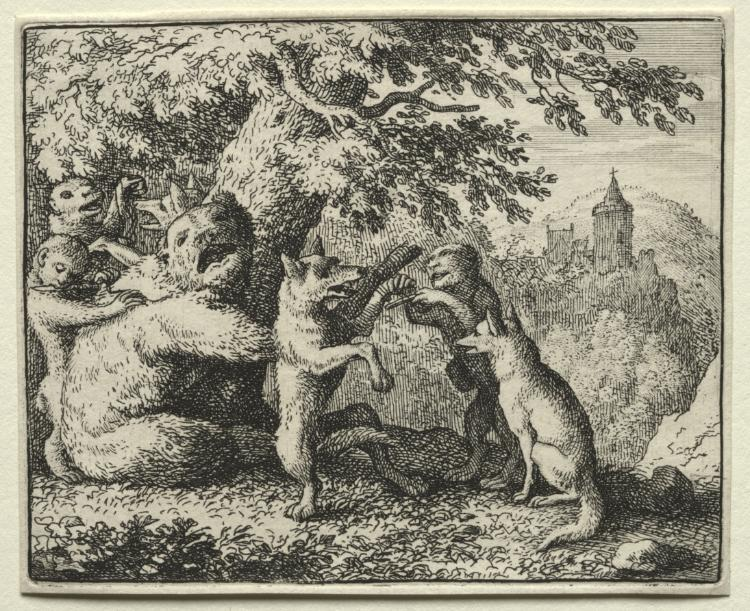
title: Reynard the Fox: Reynard Equipped for his Pilgrimage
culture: Netherlands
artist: Allart van Everdingen (Dutch, 1621–1675)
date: 1650–75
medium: etching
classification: Print